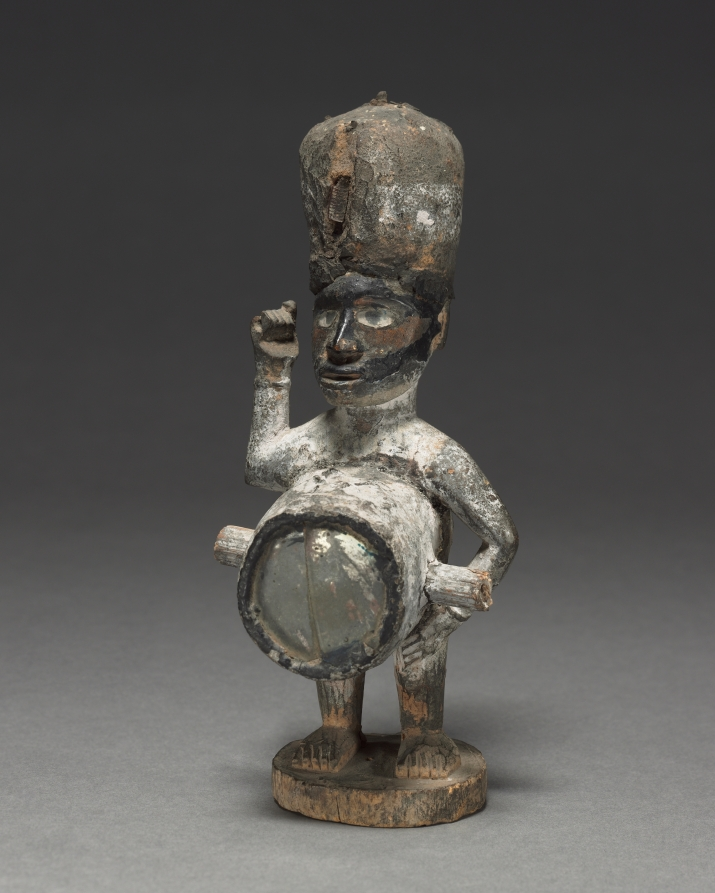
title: Power figure (nkisi)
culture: Central Africa, Republic of the Congo, Kongo people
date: late 1800s-early 1900s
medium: Wood, organic materials (including resin), probably kaolin, and metalized glass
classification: Sculpture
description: This figure is of the nduda type, characterized by the attached "guns" loaded with gunpowder and used to shoot witches. It is the only figure that adopts the threatening pose: the right hand raised, holding a spear or knife, and the left hand resting on the hip. Two guns protrude horizontally on both sides of the cylindrical medicine pack on the belly, covered with a round piece of mirror.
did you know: This is the only figure in a group of seven found in a French antique shop adopting a threatening pose.